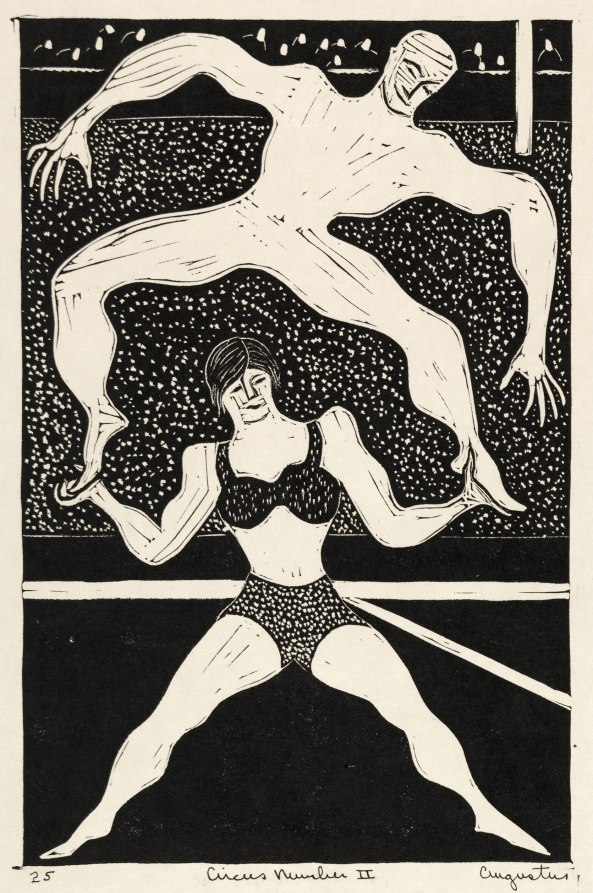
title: Circus, No. 2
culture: America, Ohio, Cleveland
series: 29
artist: Augustus Peck (American, 1906–1975)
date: 1920–30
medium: linoleum cut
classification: Print